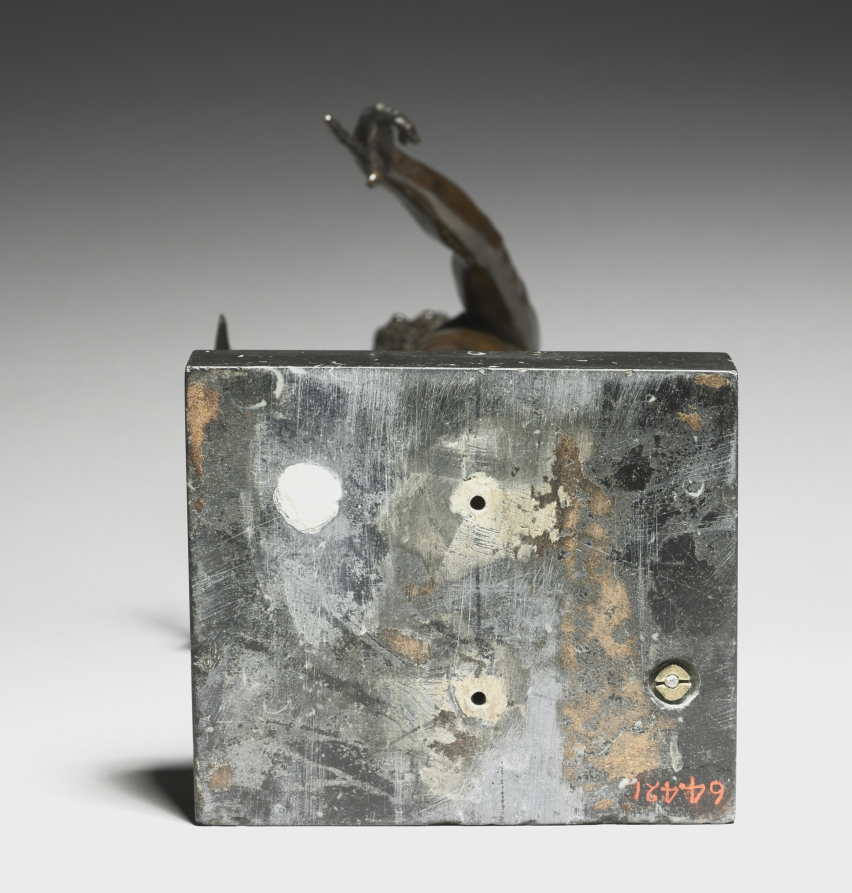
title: Mars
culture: Italy, 16th century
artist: Giambologna (Flemish, active Italy, 1529–1608)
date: c. 1584–87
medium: bronze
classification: Sculpture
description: Although he is lacking the helmet and armor common to Mars in Roman iconography, this figure is identified as the ancient god of war. Mars pauses mid-stride, swinging his sword arm back to strike an enemy in his gaze; this dynamic composition is typical of Giambologna’s models. Collectors prized small bronzes such as this and often kept them in special rooms along with antiquities, coins, shells, and other curiosities. Easy to hold and arrange due to their small size, they were appreciated through touch as well as sight.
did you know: The active, twisting pose indicates that the statue was designed to be viewed in the round.